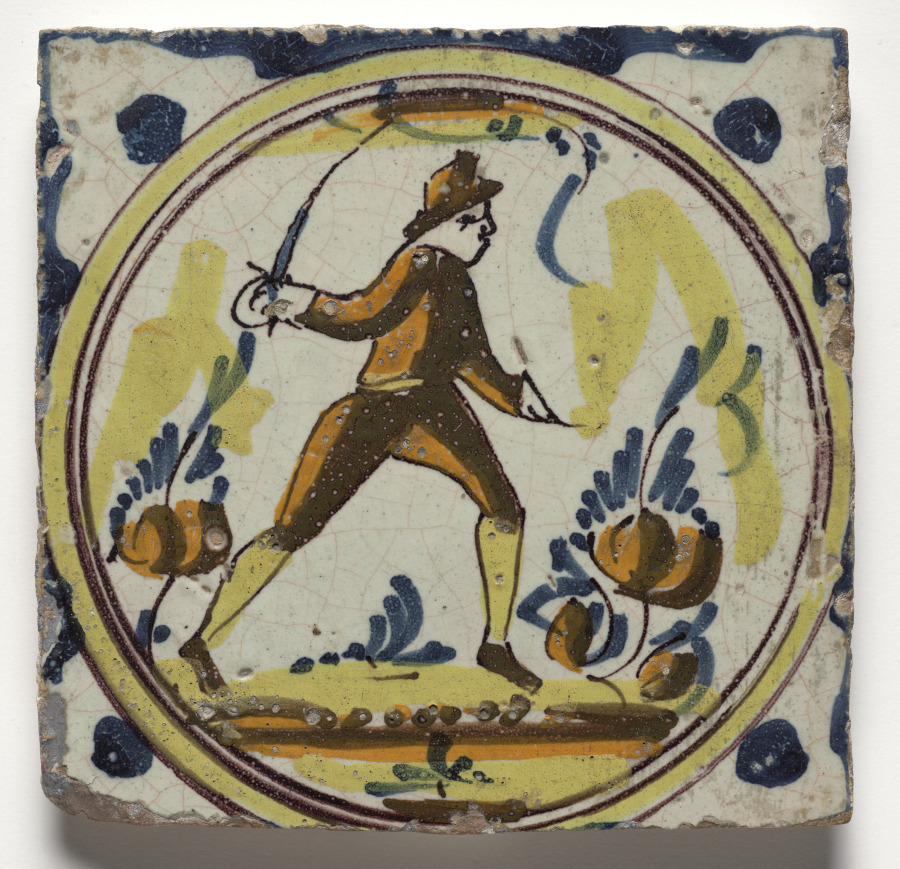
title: Wall Tile–Man with a Sword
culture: Spain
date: c. 1600s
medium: glazed ceramic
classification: Ceramic